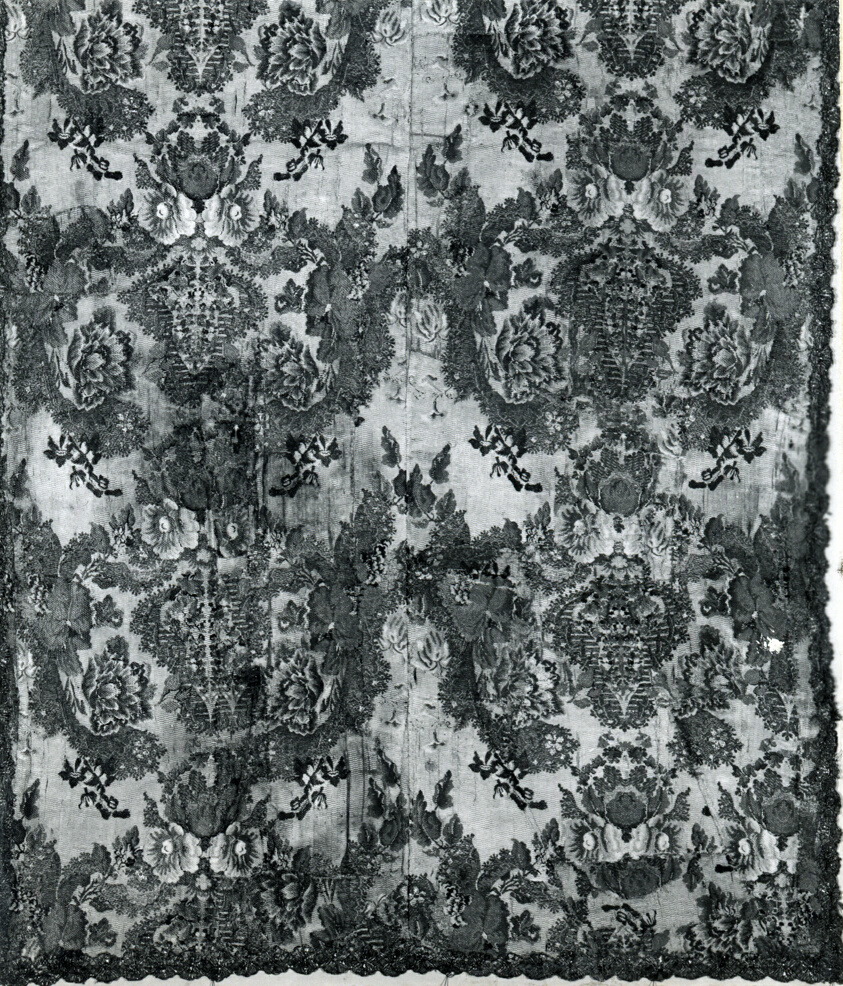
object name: Textile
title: Panel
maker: France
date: 18th century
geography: France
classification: textile; weaving